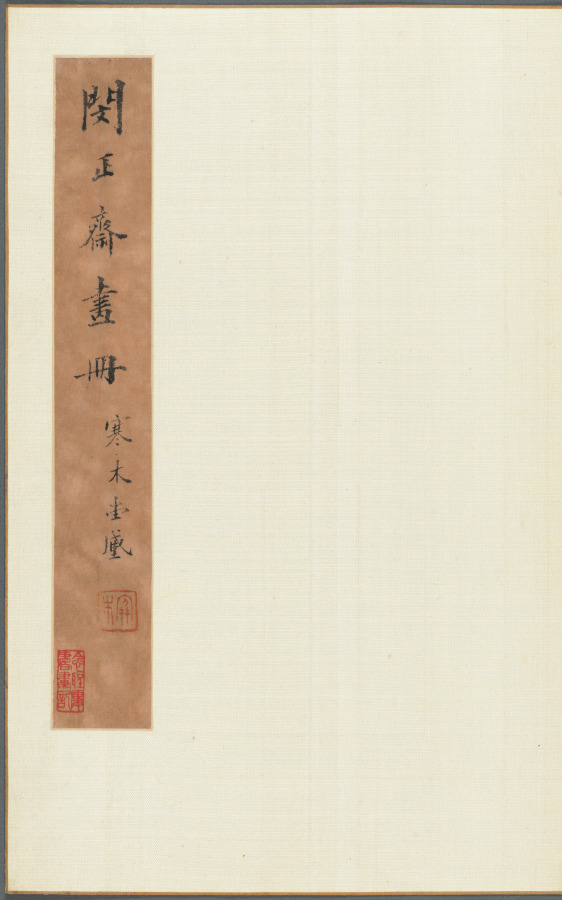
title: Album of Miscellaneous Subjects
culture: China, Qing dynasty (1644-1911)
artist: Min Zhen (Chinese, 1730–after 1788)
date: 1788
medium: Album of twelve leaves; ink on paper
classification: Painting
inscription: 予素有怪石之僻。余友戴笠山人嗜予畫，亦猶予之嗜怪石焉。向故訂約，以所好相易。值余奔馳遷延，今夏偶憶及怪石之在吾齋已五載。繪此以踐前言。誌以奇峭為十二冊之終。時戊申六月六日，正齋閔貞謹識。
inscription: Six seals appearing on the leaves: Min Zhen 閔貞; Zheng zhai 正齋; Qingqiao 青橋; Zhen 貞; Liao tang 蓼塘; Min Zhen zhi yin 閔貞之印。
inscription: 正齋傳世真跡，應推此冊為第一。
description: Min Zhen, who was orphaned at age 12 and developed an eccentric personality, was trained by Tang Yin (1682–1756), a writer, playwright, and superintendent of the imperial porcelain workshops in Jingdezhen. The connection to him may have enabled Min to stay in Beijing for a decade from around 1773. It is not clear whether he ever resided in Yangzhou, but his style is in many instances reminiscent of that of Yangzhou artist Huang Shen. This album demonstrates Min’s versatility and mature style in the last years of his life.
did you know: This album was painted for his friend Dailili Shanren in exchange for a scholar’s stone.